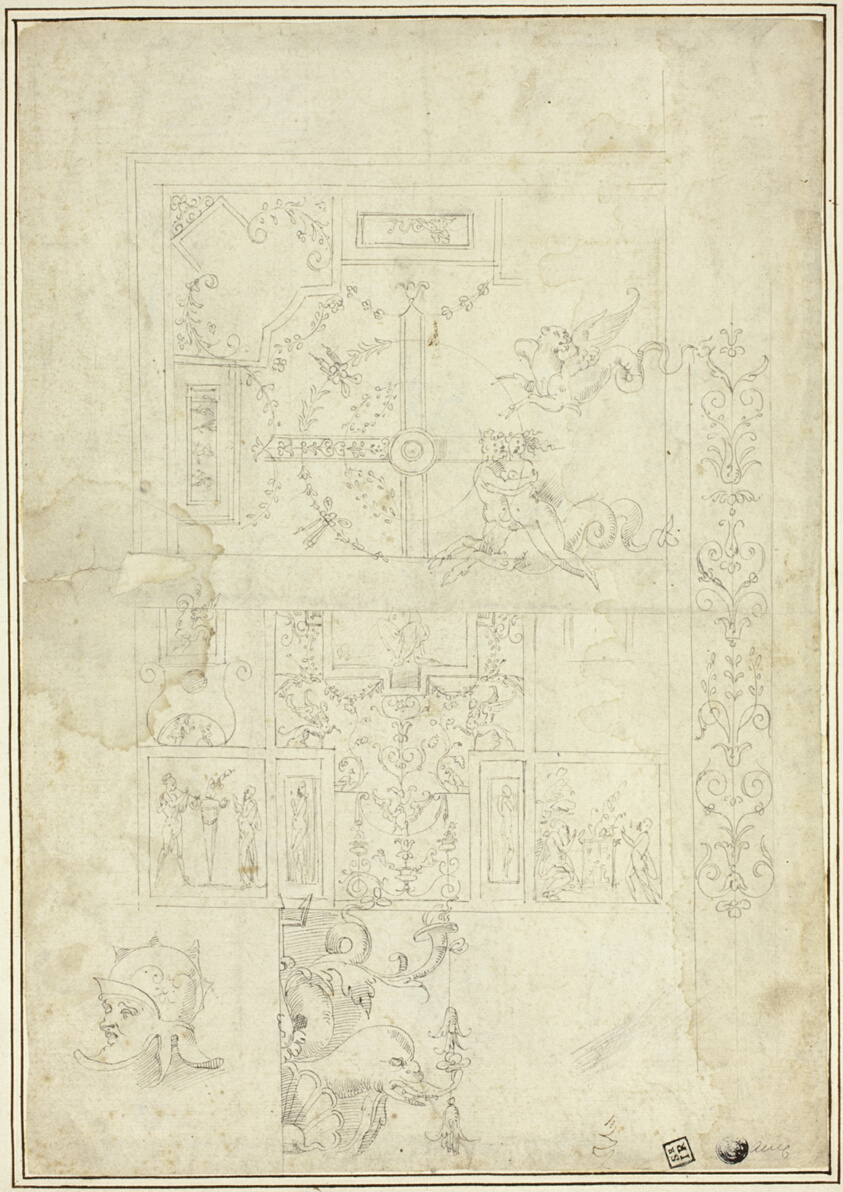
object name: Drawing and Watercolor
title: Ceiling Design, with Sketches of Ornamental Border, Helmeted Head (recto); Sketches of Ornamental Details (verso)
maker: School of Giovanni da Udine, called Giovanni dei Ricamatori (Italian, 1487-1561); or School of Perino del Vaga (Italian, 1500/01-1547)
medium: Pen and brown ink, with touches of graphite, on ivory laid paper, edge mounted on to ivory laid paper (recto), and pen and brown ink on ivory laid paper (verso)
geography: Italy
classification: pen and ink drawings; drawings (visual works); prints and drawing